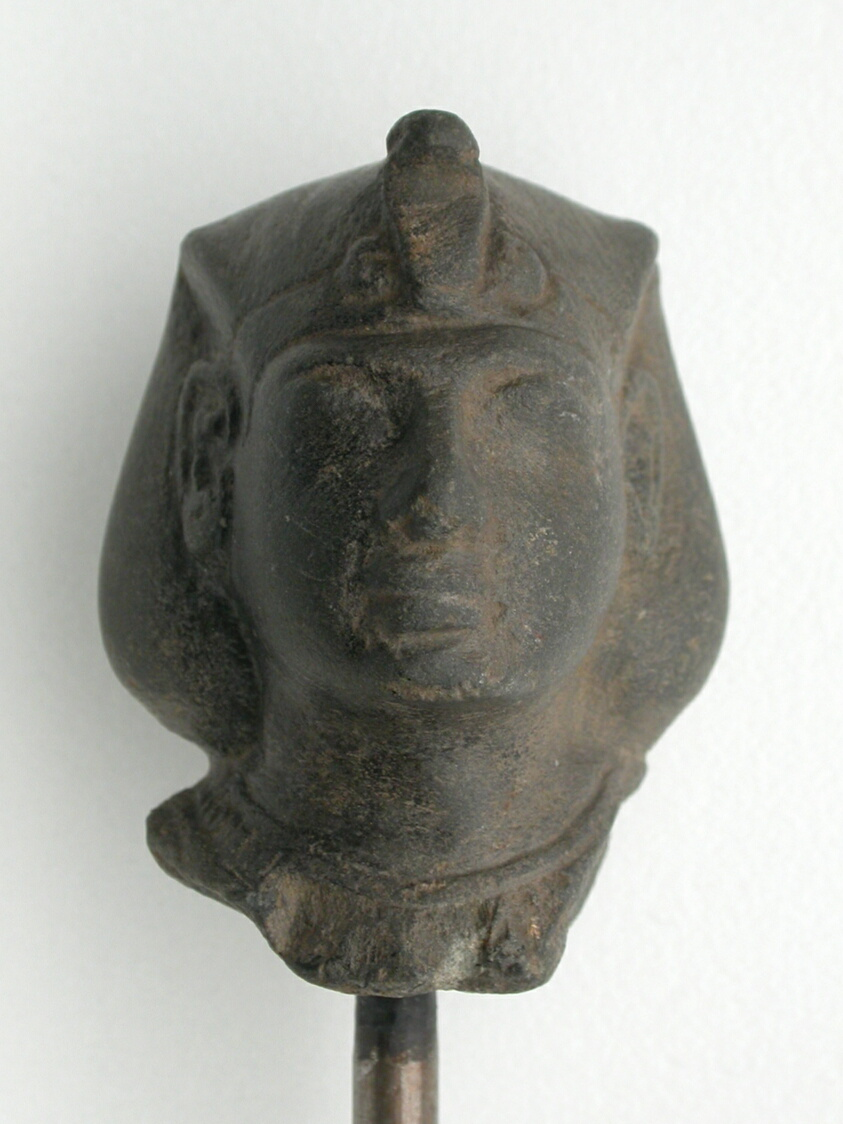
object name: Sculpture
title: Head from Statuette of a King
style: late period (egyptian), ancient, egyptian, twenty-sixth dynasty, saite period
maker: Egyptian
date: Late Period, Dynasty 26 (664–525 BCE)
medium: Black basalt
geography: Egypt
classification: stone; sculpture; ancient art